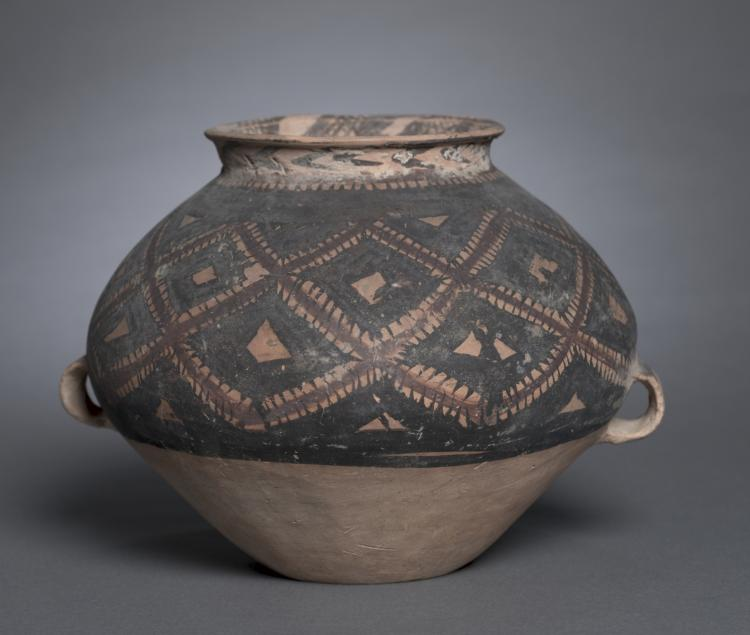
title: Vase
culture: China, Gansu province, Neolithic period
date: c. 3000–2500 BCE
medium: earthenware with slip coating and painted decoration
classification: Ceramic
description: This Neolithic Chinese vessel has an ovoid body with two handles. Its neck is short and splays outward into a wide opening. It is decorated with a continuous lozenge motif. The material is a fine, reddish-buff clay slightly polished and then painted in black and red.